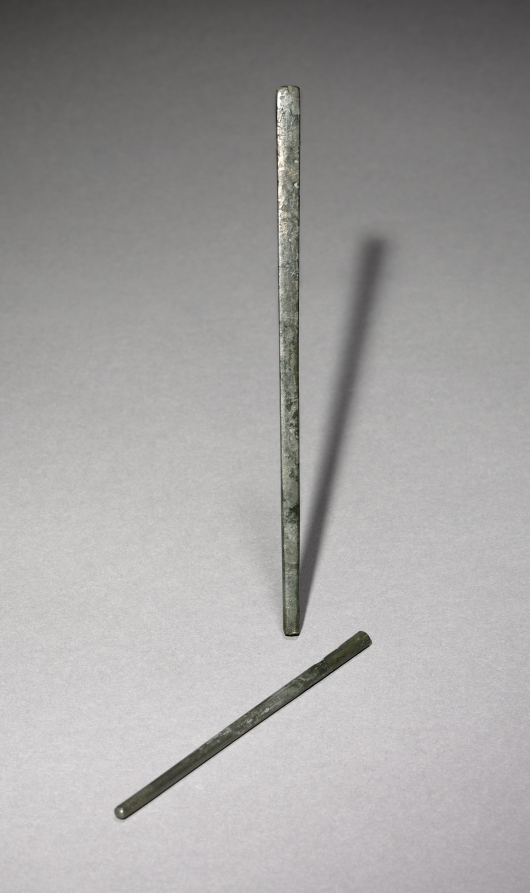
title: Chopstick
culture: Korea, Goryeo dynasty (918–1392)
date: 918–1392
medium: bronze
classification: Metalwork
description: In Korea, chopsticks made of metal such as brass, silver, and gold were excavated from ancient tombs and ruins dated to the 6th century at the earliest. Burial goods often include utilitarian objects such as table wares and utensils because the dead were believed to need them in the afterlife.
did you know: In contrast to the Chinese and Japanese, Koreans still prefer metal chopsticks (stainless steel and brass) to wooden ones.